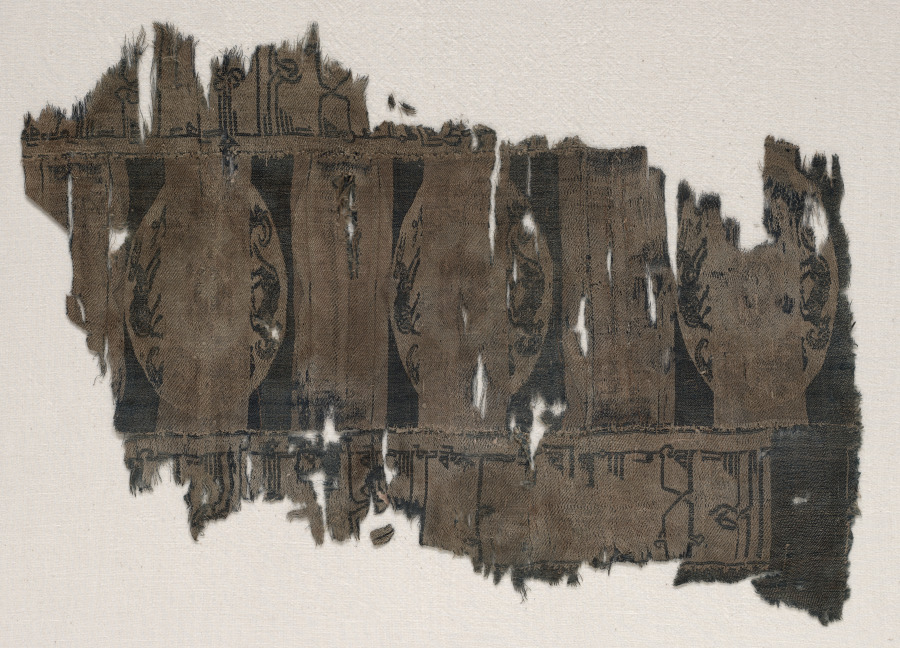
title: Fragment with running animal roundels and kufic inscriptions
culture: Iran, in the style of the Buyid period (945–1055)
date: 1530–1950 (radiocarbon date, 95% probability)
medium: Silk: lampas weave, brocaded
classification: Textile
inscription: [daygha]m wa-kam asadan rawwa'a juhur kilab aya asadan fi jismihi ruh. . .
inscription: . . .aya asadan fi jismihi ruh daygham wa-kam asadan rawwa'a [ju]hur kilab aya asadan fi. . .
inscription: inni i'taqadtu bi-wa'idka wa-'adlika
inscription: wa-arhab ihsanika [wa-fad]lika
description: This fragment preserves a wide central band flanked by narrower inscription bands. The narrower bands contain, on a dark blue background a continuous inscription in elaborate Kufic, the ivory-colored lettering oriented at right angles to the warp. On the wider ivory panel there appear ovals enclosing a frieze of running animals within which are hexagons enclosing stars. The ovals alternate vertically with cartouches containing an inscription in simple Kufic, the design appearing in blue, pink, and ivory.